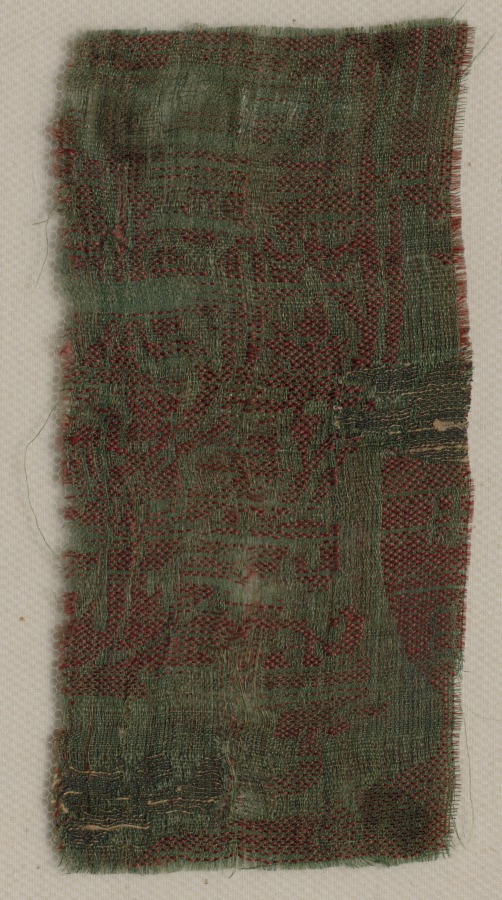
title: Three Fragments of Italian Gothic Silk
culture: Italy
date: 1300s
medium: lampas weave, brocaded; silk and gold thread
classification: Textile